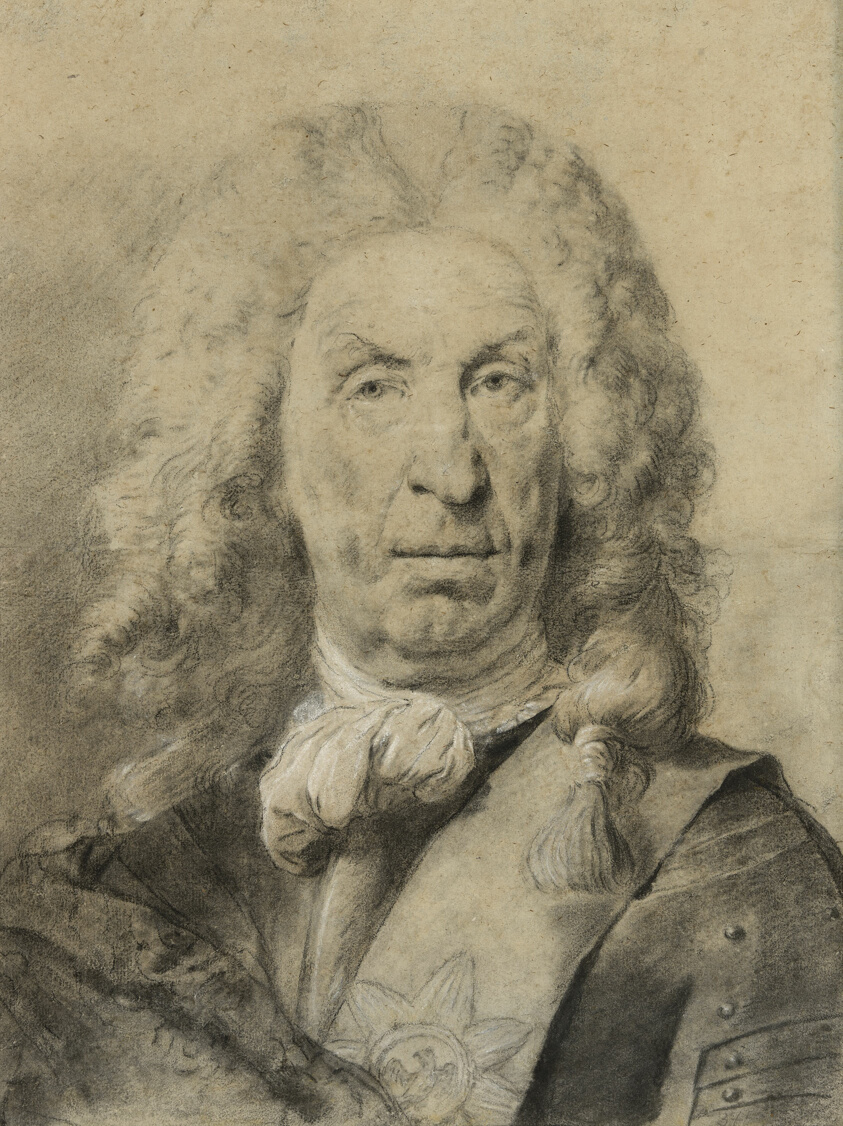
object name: Drawing and Watercolor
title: Portrait of Marshal von der Schulenburg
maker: Giovanni Battista Piazzetta (Italian, 1682-1754)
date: c. 1735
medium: Black chalk and charcoal with stumping, heightened with touches of white chalk, on blue-gray laid paper, discolored to cream, laid down on wood pulp board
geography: Italy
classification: chalk; drawings (visual works); prints and drawing